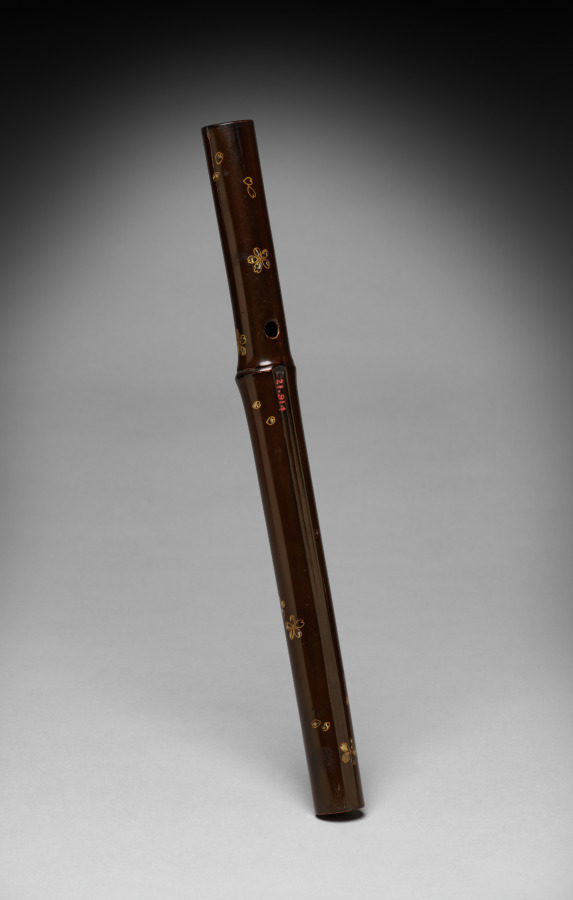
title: End-blown Flute (Hitoyogiri)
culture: Japan, Meiji period (1868–1912)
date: late 1800s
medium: Lacquered bamboo with gold and silver maki-e (sprinkled powder designs)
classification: Musical Instrument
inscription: 篠本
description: The hitoyogiri 一節切 is considered one type of shakuhachi 尺八 bamboo flute and was popular in the 16th and 17th centuries. It is smaller and of weaker sound than the better known fuke 普化, and was thus known as a "small bamboo" or kotake 小竹, during a brief 19th-century revival. The node of the bamboo is positioned between the four finger holes on the front, and the thumb hole at the top of the back. This one has a design of cherry blossoms and scattered petals.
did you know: The name of this flute, hitoyogiri 一節切 comes from the fact that it has a single node in the bamboo from which it is made.